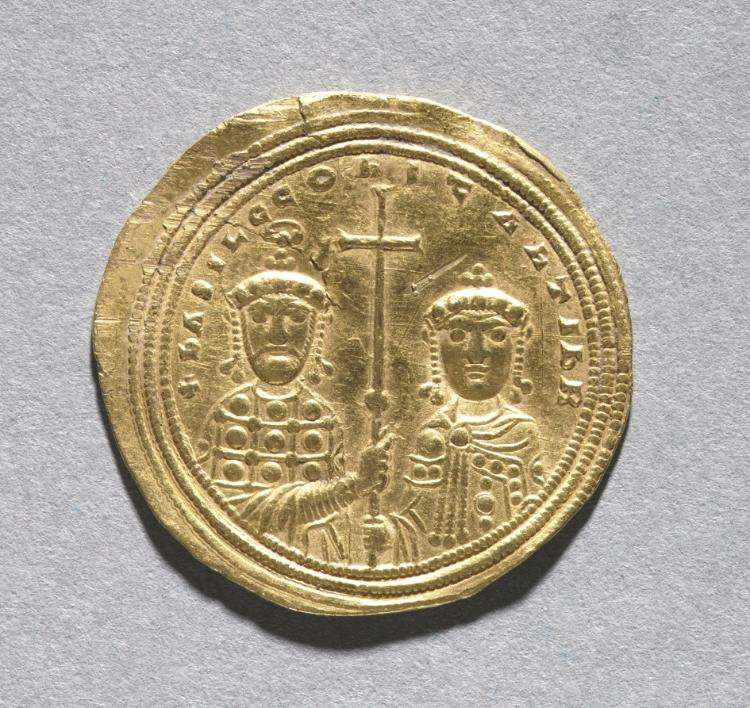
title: Nomisma with Basil II Bulgarotonos and His Brother Constantine VIII (reverse)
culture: Byzantium, Constantinople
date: 977–1025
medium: gold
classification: Coins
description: The vast number of surviving Byzantine coins attests to the level of trade across the empire. Controlled and supervised by the emperor, the producers of coins took care to represent his authority and reflect his stature. Talented artists were recruited to engrave the dies (molds) used for the striking of coins. Emperors increasingly came to include their heirs and co-emperors on their coinage, as well as other family members or even earlier rulers. Coins were recognized, then as now, as small, portable works of art. With their inscriptions and images, Byzantine coins provide valuable documentation of historical events and a record of the physical appearance of the emperors. The coins shown here include the solidus, the basic gold coin of 24 karats; the tremissis, a gold coin of one-third the weight and value of the solidus; and the nomisma, which in the 10th century replaced the solidus as the standard gold coin.